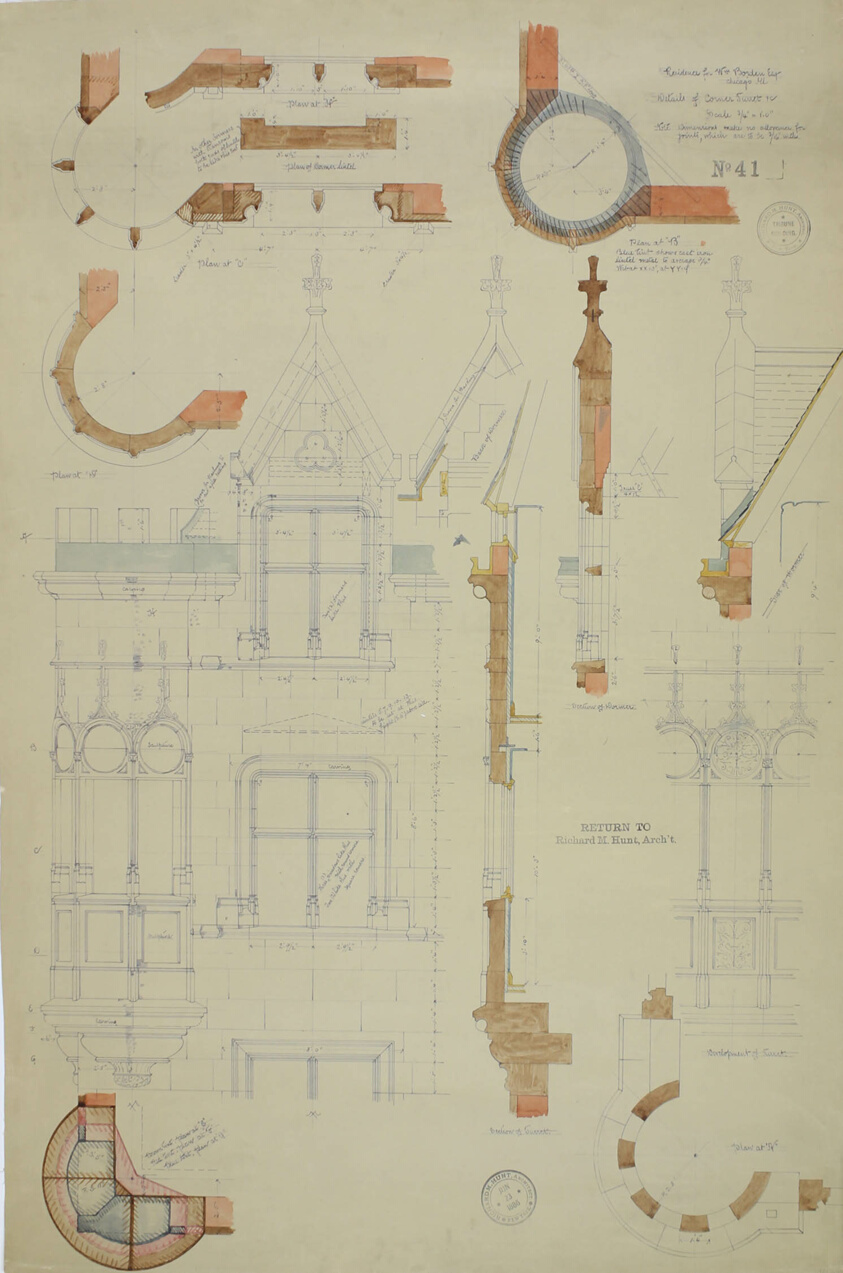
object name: Architectural Drawing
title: William Borden Esq. House, Chicago, Illinois, Detail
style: 19th century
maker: Richard Morris Hunt (American, 1828-1895)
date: June 23, 1886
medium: Watercolor on hectographic prints mounted on linen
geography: Chicago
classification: architectural drawing; architecture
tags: Chicago, architecture, drawing, design, illinois, houses